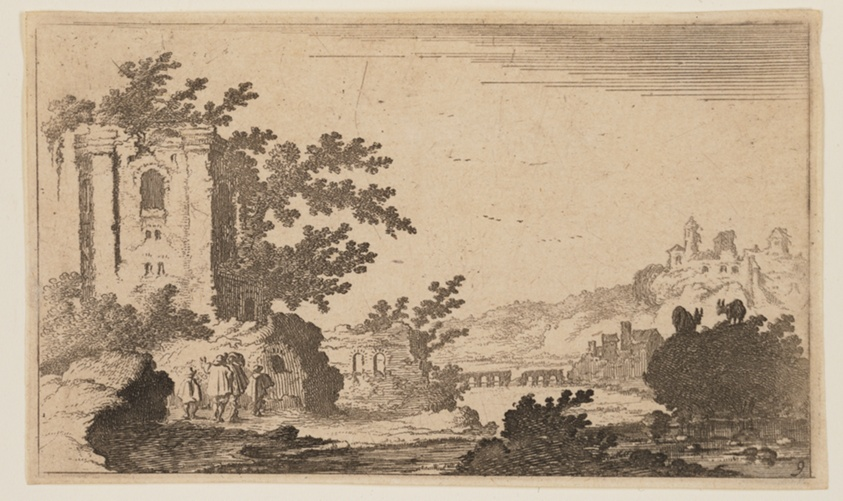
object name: Print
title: Ruins to Left of a River in Hilly Country, from Twelve Landscapes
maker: Gillis van Scheyndel (Dutch, 1595–1660)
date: c. 1605-1650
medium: Etching on ivory laid paper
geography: Netherlands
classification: etching; paper; print; prints and drawing